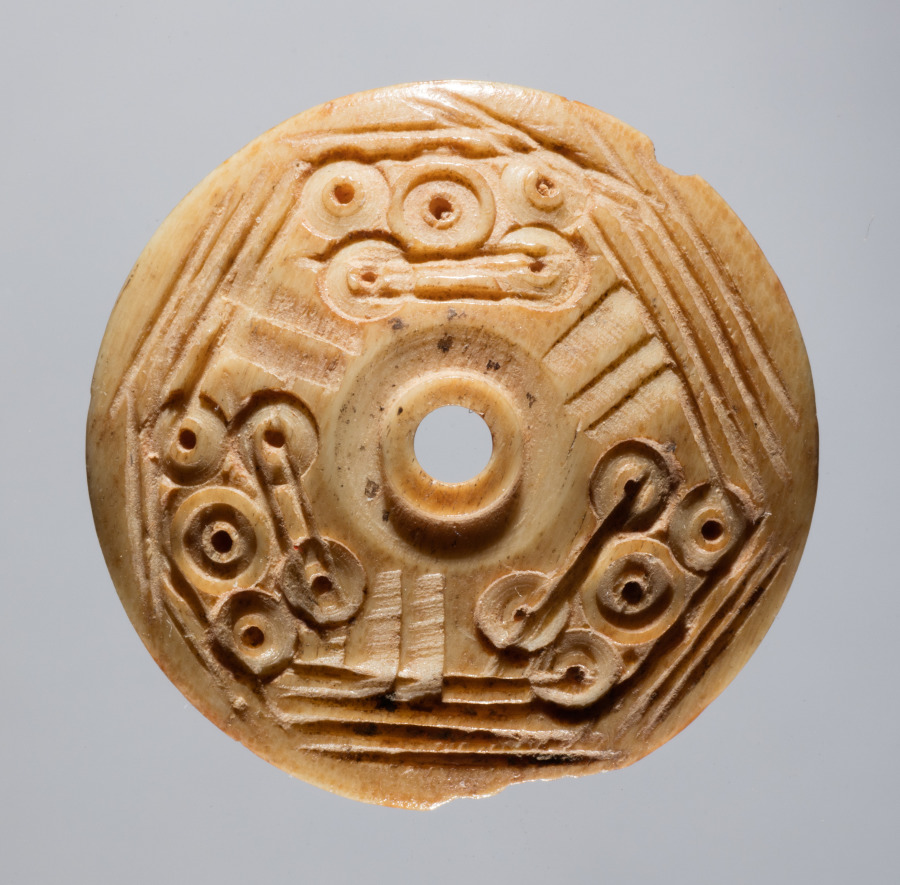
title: Spindle Whorl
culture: Iran, early Islamic period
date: 700s - 900s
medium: bone, incised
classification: Spindle Whorl